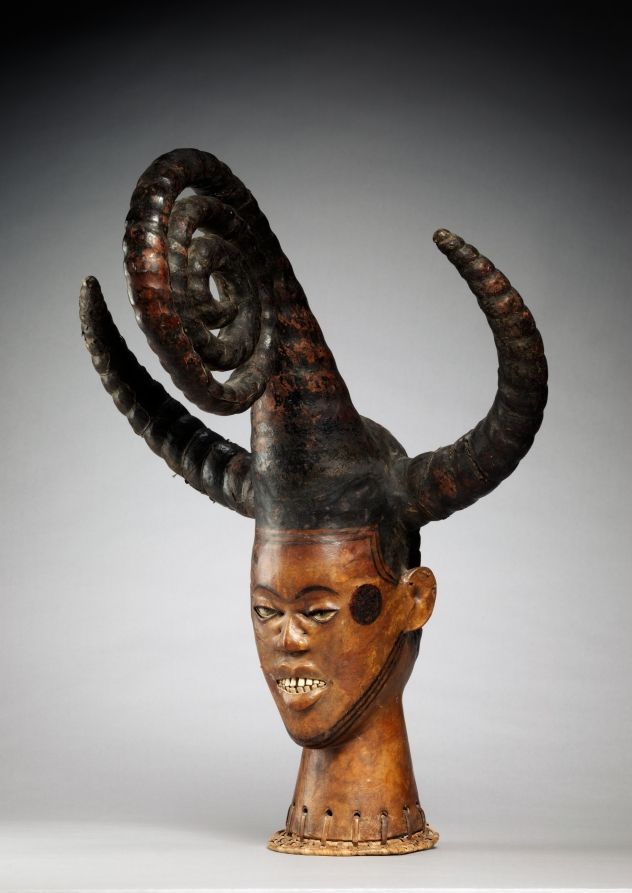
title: Headdress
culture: Africa, West Africa, Nigeria, Ejagham-style maker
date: early 1900s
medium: Wood, rawhide, cane, paint, bone or ivory, natural fiber, and metal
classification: Mask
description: Headdresses or crest masks made of antelope skin stretched over a carved head are a distinctive art form of the Cross River region in southeastern Nigeria and western Cameroon. This female evocation of ideal feminine beauty was most probably worn by an Ejagham woman in the context of a female society called Ekpa, which was responsible for the education of girls in preparation for marriage.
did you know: The headdress represents a girl that evokes ideal female beauty and is ready for marriage. The depicted hairstyle was worn during the coming-out ceremony following the girls’ seclusion.